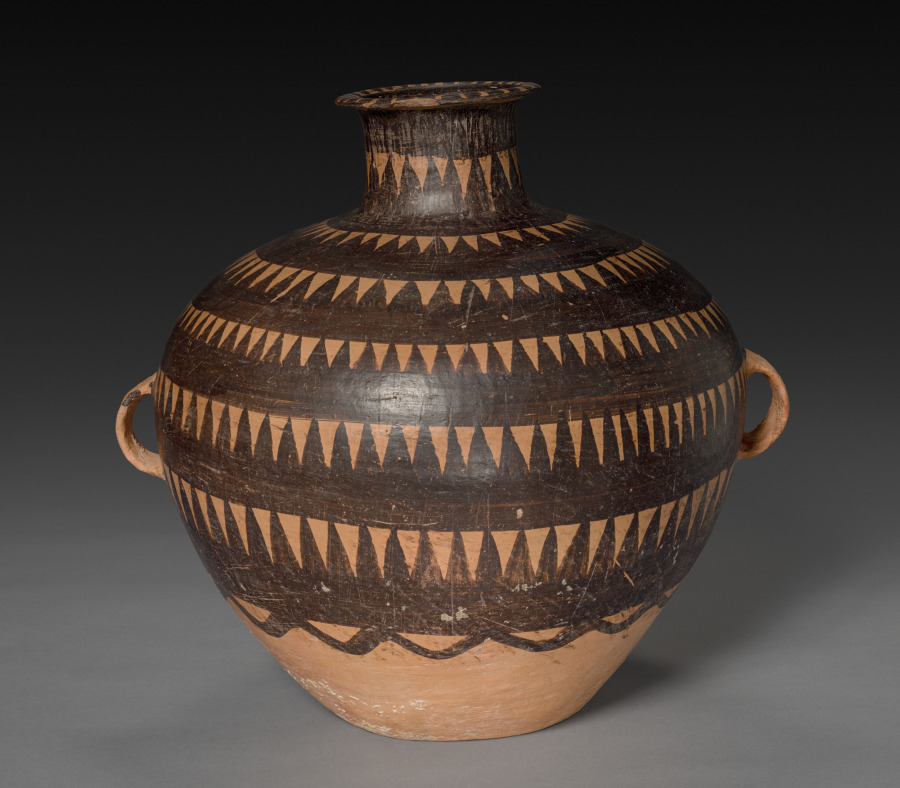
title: Urn with Triangular Patterns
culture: Northwest China, Neolithic period, Majiayao culture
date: c. 3300–c. 2000 BCE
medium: Earthenware with slip-painted decoration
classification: Ceramic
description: Majiayao is the name of one of the earliest cultures of China. They were renowned for production of vessels with black-slip painted patterns.